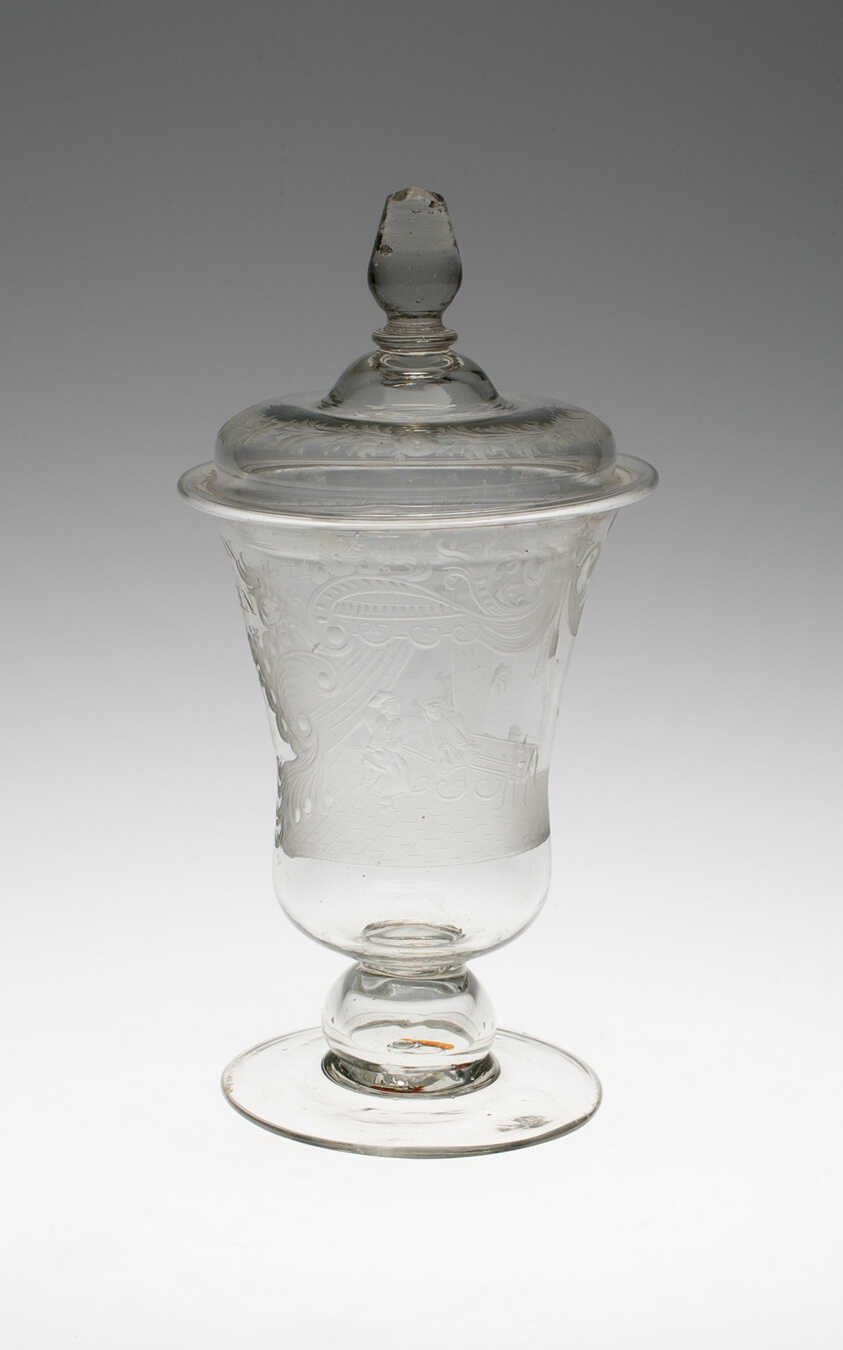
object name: Glass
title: Birth Glass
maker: Netherlands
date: c. 1750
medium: Glass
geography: Netherlands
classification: drinking vessel; glass; european decorative arts